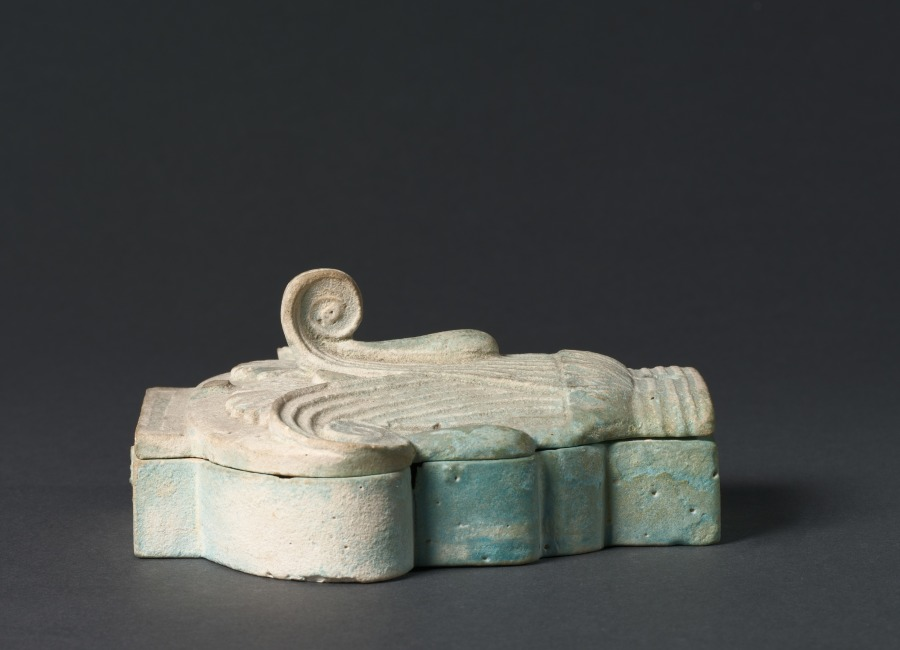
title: Box (Pyxis) in the Form of a Composite Capital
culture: Egypt, Greco-Roman period (332 BCE–395 CE), Ptolemaic dynasty (305–30 BCE)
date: 305–30 BCE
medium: pale robin's-egg blue faience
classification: Vessels